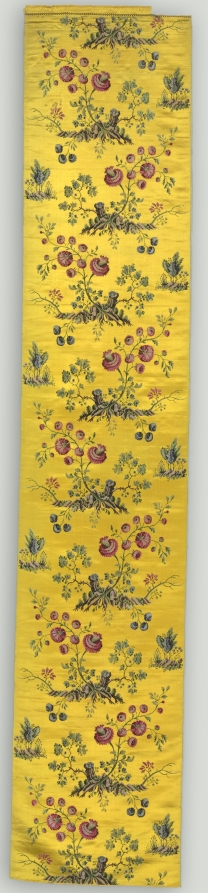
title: Floral Panel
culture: France, 19th century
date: 1800s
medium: brocade and weft-patterned weave with complementary wefts; silk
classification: Textile